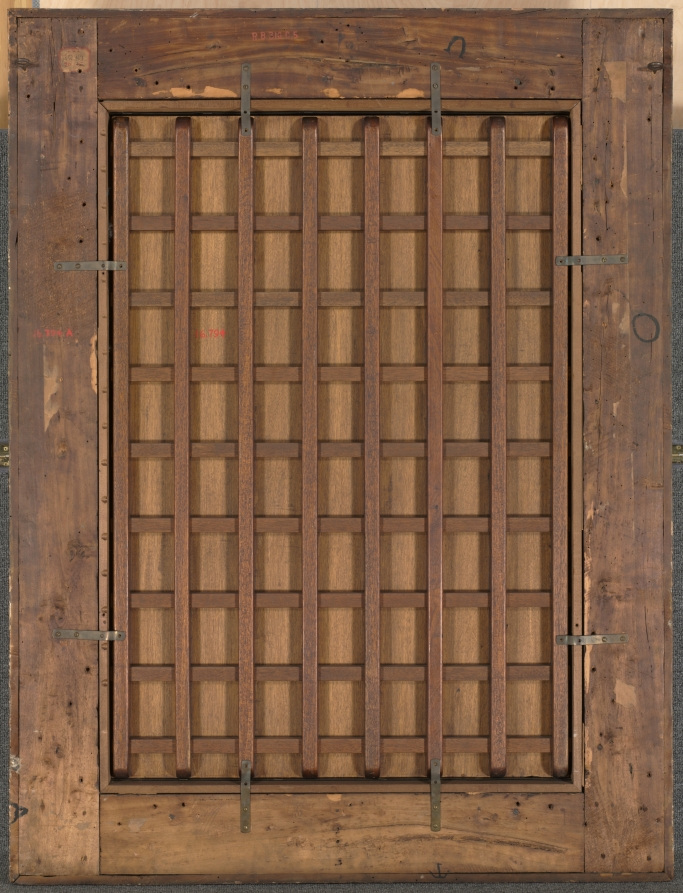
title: Portrait of an Old Man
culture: Italy, 16th century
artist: attributed to Giulio Campi (Italian, c. 1500–1572)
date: mid-1500s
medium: oil on wood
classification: Painting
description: Part of a distinguished family of Northern northern Italian painters, Campi depicts his sitter with an unidealized face dominated by carefully observed wrinkles. He stares out intently while grasping what may be a letter with its paper seal broken in his right hand. Despite this intense gaze the figure does not establish a lively connection with the viewer, and his mood remains distant and reserved, in keeping with Renaissance ideas about elegant comportment. Though his costume appears plain, the sumptuous black fabric was indicative of high status in some parts of Europe. --Michele Frederick (December 2011)